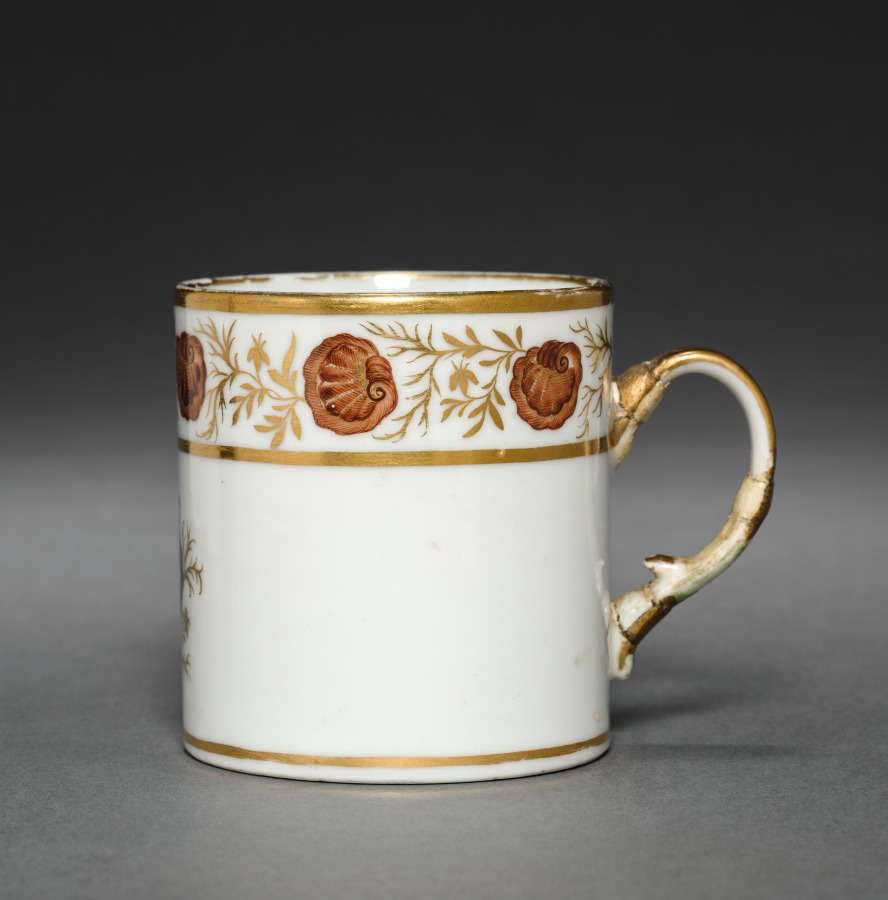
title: Cup from Oliver Wolcott, Jr. Tea Service (6 of 6)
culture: Chinese Export porcelain, late 18th-early 19th century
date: 1785–1805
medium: porcelain, sepia enamel, gold leaf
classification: Ceramic